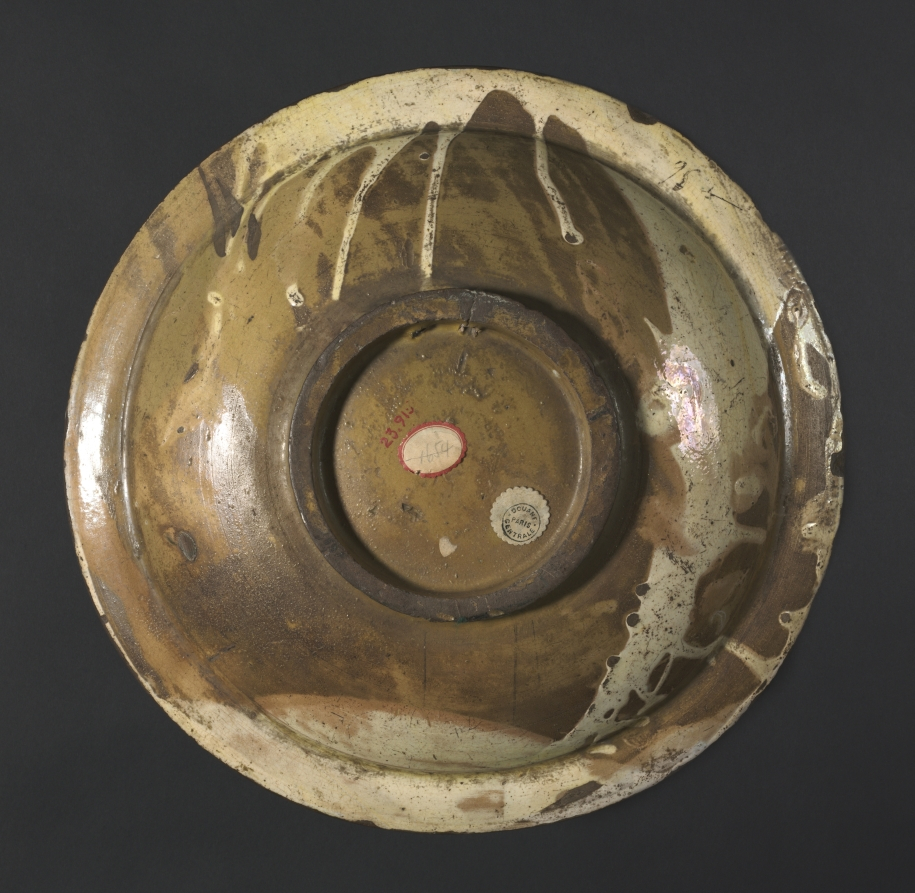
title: Plate Depicting a Lion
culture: Italy, Cafaggiolo, 15th century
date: late 1400s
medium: tin-glazed earthenware (maiolica)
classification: Ceramic